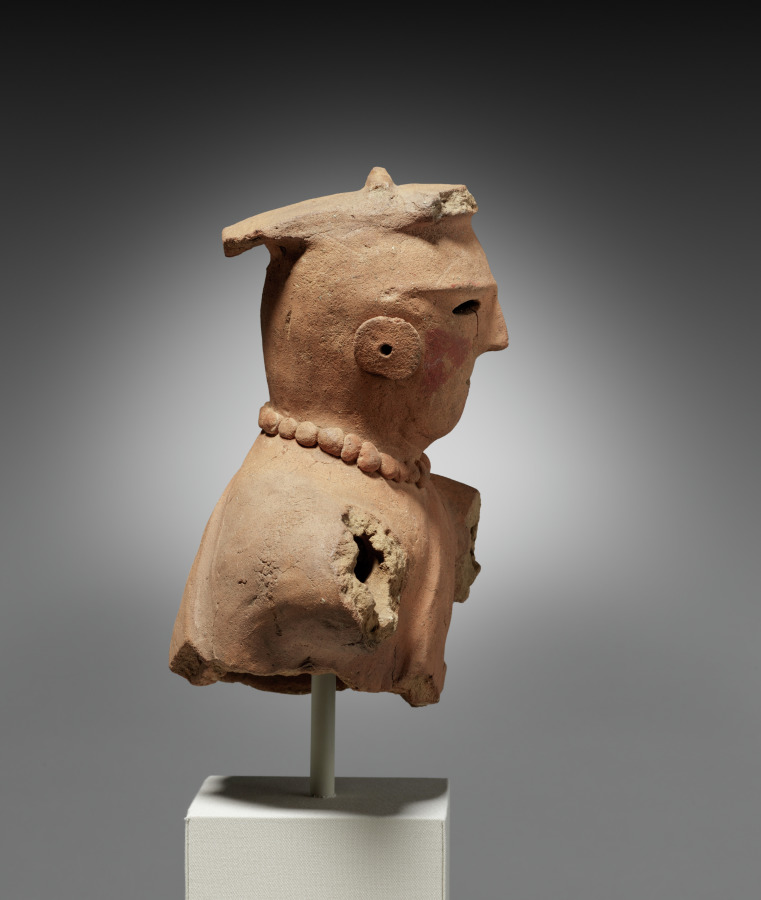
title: Haniwa Figure of a Female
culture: Japan, Kofun period (300–710 CE)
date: 500s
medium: earthenware with traces of pigment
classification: Sculpture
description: Figures in a variety of dress including military and ceremonial garb start to appear on Japanese earthen mounded tombs called old mounds (kofun) from the 400s to 500s CE. This fragment depicts a woman with red triangles on her face and wearing jewelry. Archaeologists speculate that the facial markings had a ritual or symbolic function, perhaps indicating she is a female shaman. Many figures of this kind have been found in digs in the Kanto region of eastern Japan. We can only guess at the meaning of the clay cylinders called haniwa.